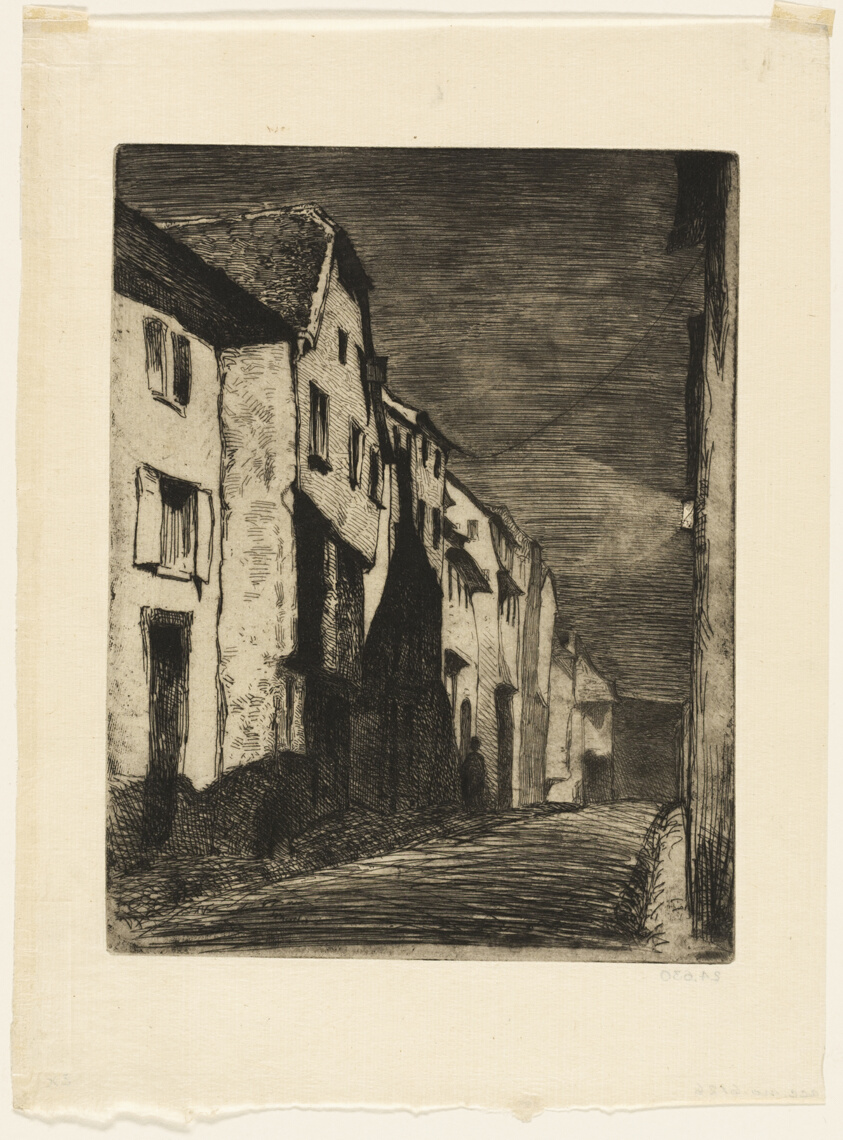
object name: Print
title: Street at Saverne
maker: James McNeill Whistler (American, 1834-1903)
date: 1858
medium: Etching with foul biting in black ink on ivory Japanese paper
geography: United States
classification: etching; foul biting; print; prints and drawing; paper